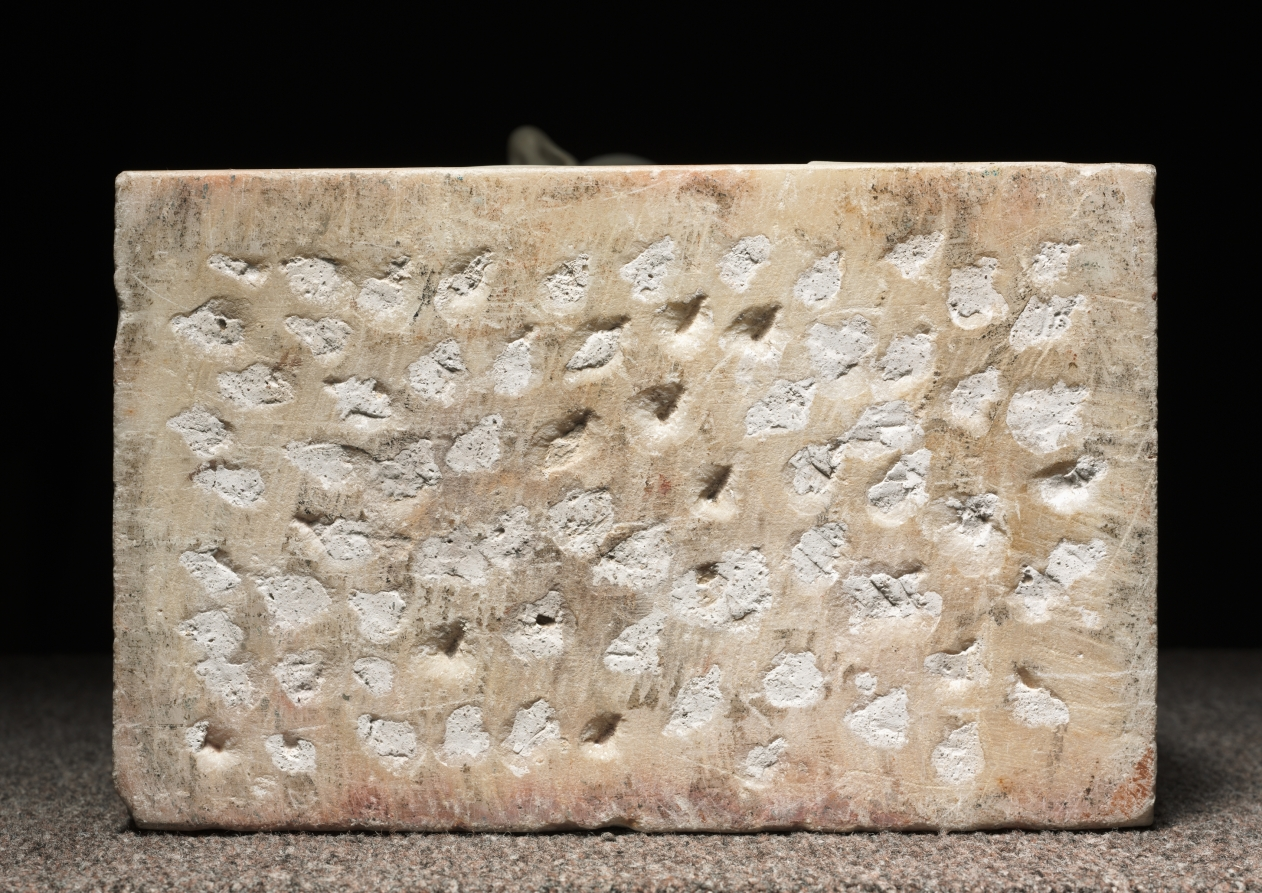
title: Sir H. C. Englefield, Bart.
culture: England, 19th century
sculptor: Francis Legatt Chantrey (British, 1781–1841)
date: 1818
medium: marble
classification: Sculpture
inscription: inscribed left side: Chantrey/Sculptor/1818; rear: Sir H. C. Englefield, Bart.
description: To modern eyes, a bare-chested portrait of a man in his mid-60s might seem undignified. However, it was fashionable for gentlemen of Englefield’s generation to be portrayed in this manner, deliberately referencing the antique sculptures of Roman statesmen they admired. As a Catholic, Englefield was barred from taking part in politics in England; however, he was a member of several clubs devoted to the amateur study of art, science, and history. Among these were the Society of Dilettanti, which championed the works of antiquity and promoted the creation of modern art in the same spirit—like this marble bust by celebrated sculptor Francis Legatt Chantrey.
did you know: Initially, Chantrey tried to establish himself as a portrait painter. After 1805, he painted only on occasion and from 1811–20, he became the leading portrait sculptor in Regency Era Great Britain.